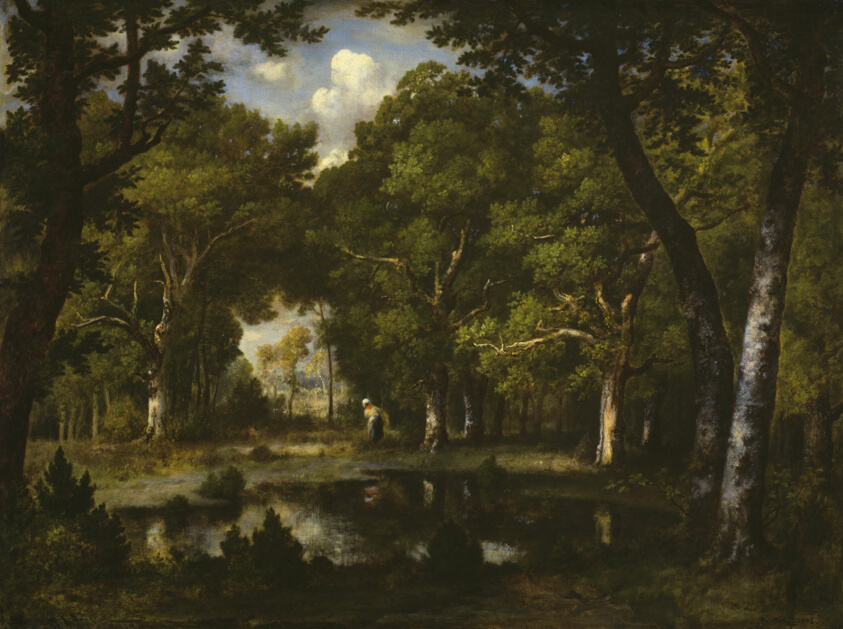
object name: Painting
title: Pond in the Woods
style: Barbizon School, 19th century, nineteenth century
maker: Narcisse Virgile Diaz de la Peña (French, 1807–1876)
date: 1862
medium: Oil on canvas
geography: France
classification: painting; france; french; oil on canvas; oil paintings (visual works); paint; european painting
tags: pond, France, French, clouds, figures, forests, nature, reflections, rural life, sky, trees, water, woman, women